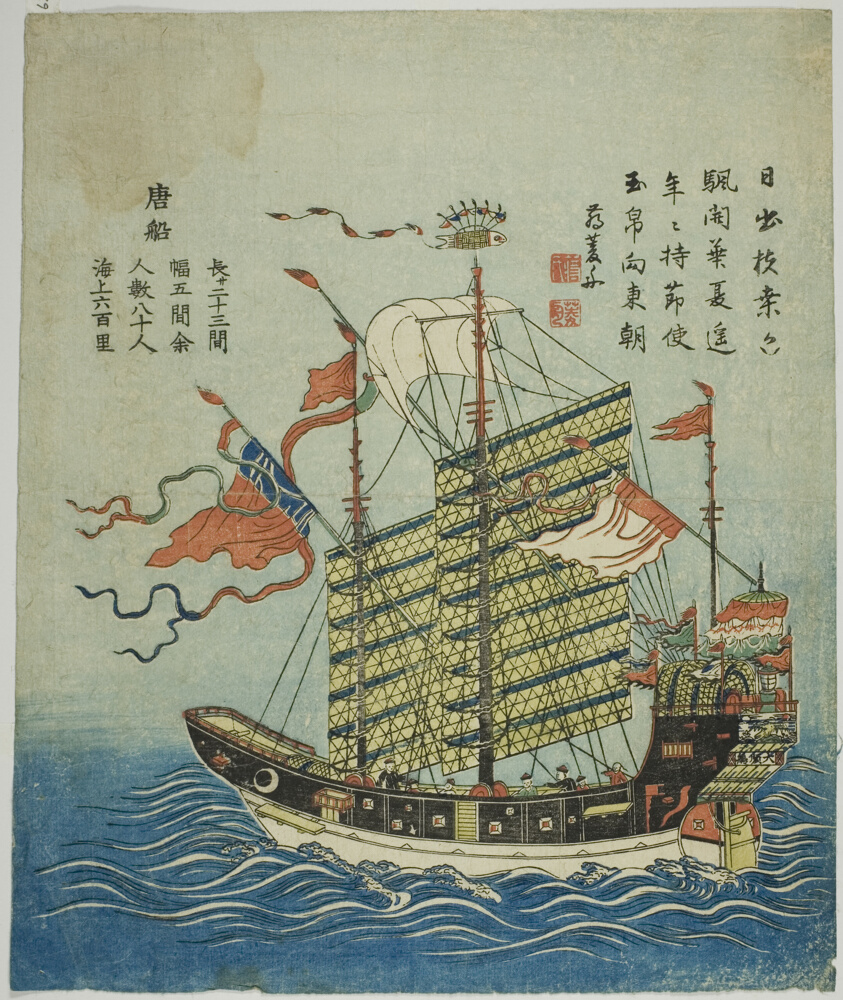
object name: Print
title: Chinese Ship (To Sen)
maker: Unknown Artist (Japanese, active in late 18th century to mid 19th century)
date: 1780s-1850s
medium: Color woodblock print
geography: Japan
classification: woodblock print; print; asian art